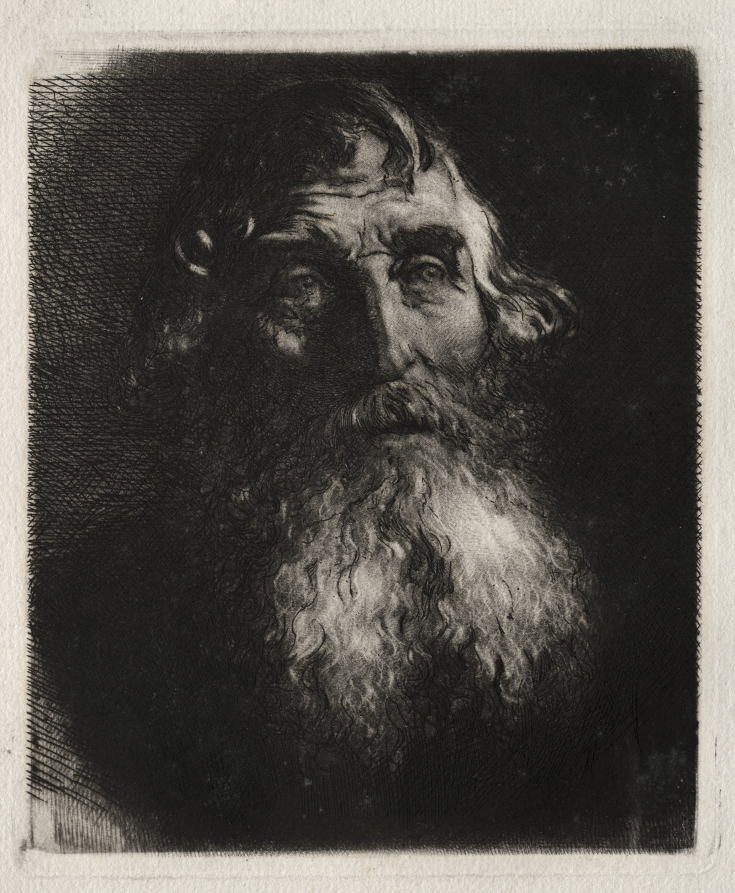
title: Study of an Old Man's Head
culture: England, 19th century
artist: Hubert von Herkomer (British, 1849–1914)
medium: etching and roulette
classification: Print